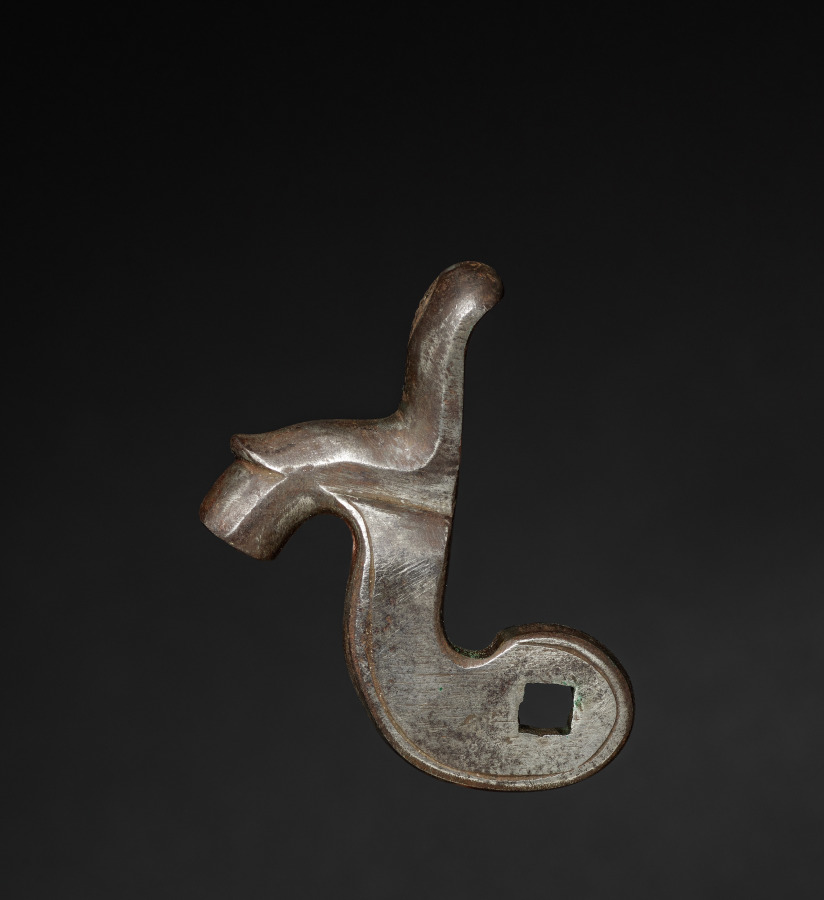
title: Gun-Lock Hammer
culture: England, early 19th century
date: c. 1800–1825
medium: steel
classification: Arms and Armor